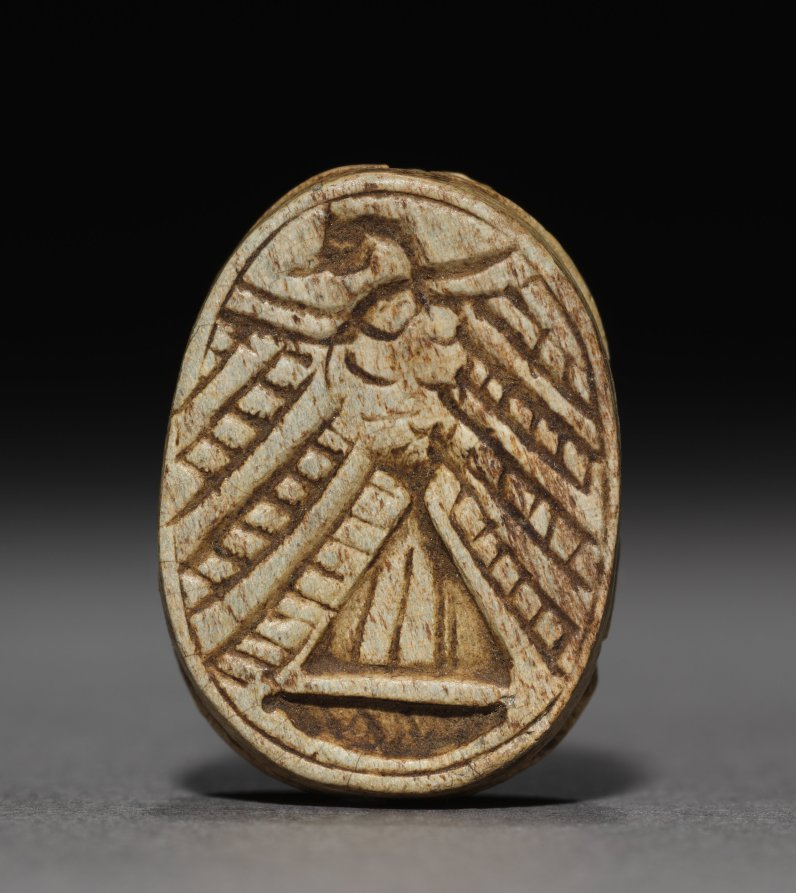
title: Scarab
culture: Egypt, Modern forgery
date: 1900–1914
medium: steatite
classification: Scarabs